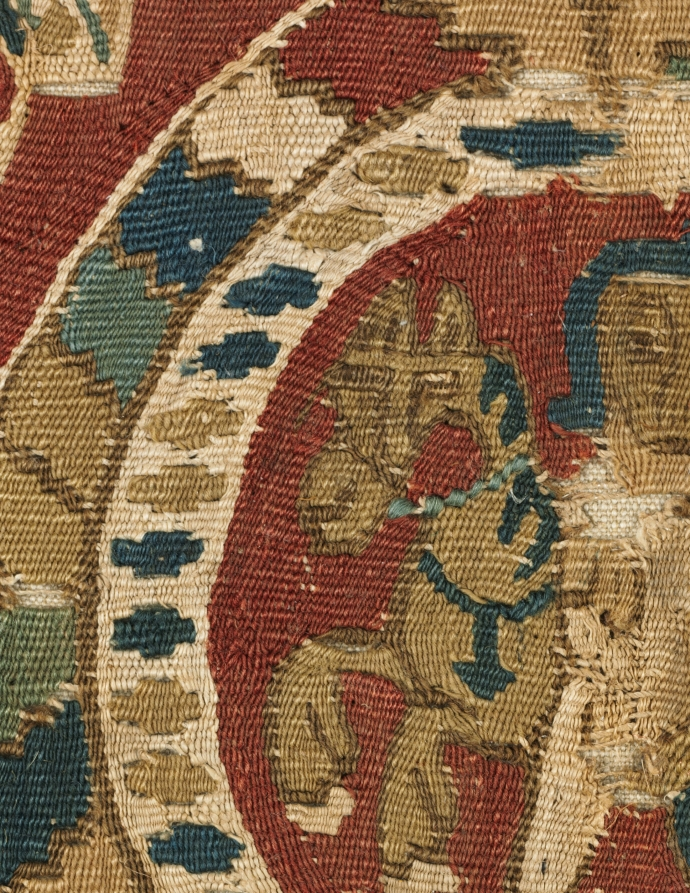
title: Segmentum from a Tunic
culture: Egypt, Abbasid period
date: 800 – 850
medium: tapestry weave; wool and linen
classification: Textile